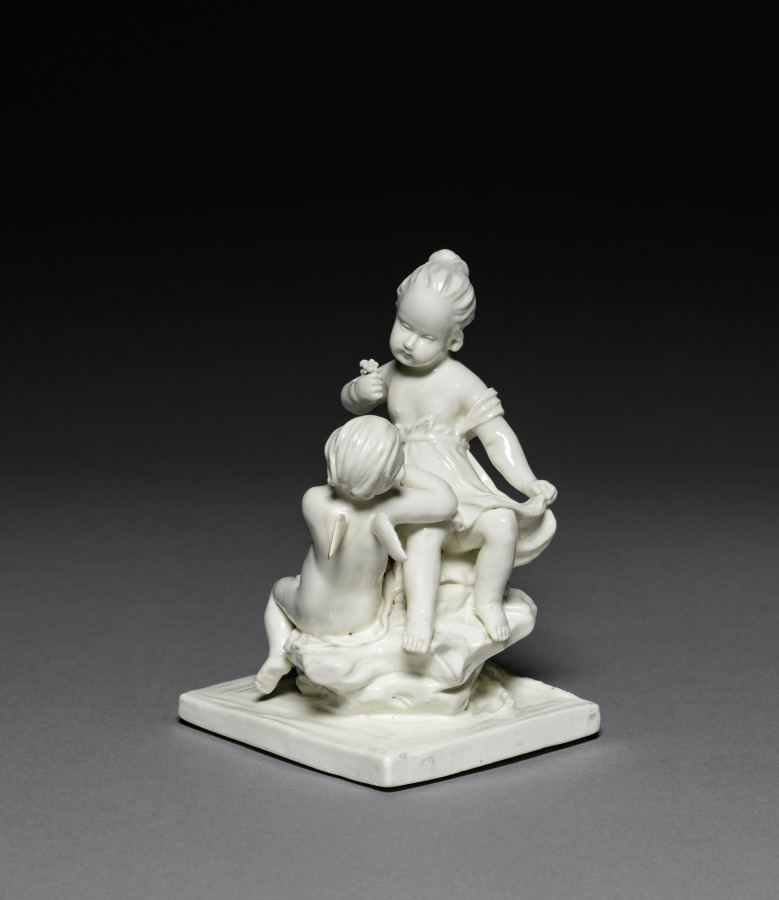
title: Girl with Putto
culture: France, Chantilly, 18th century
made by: probably by Chantilly Porcelain Factory (French)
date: 1760s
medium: soft-paste porcelain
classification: Ceramic